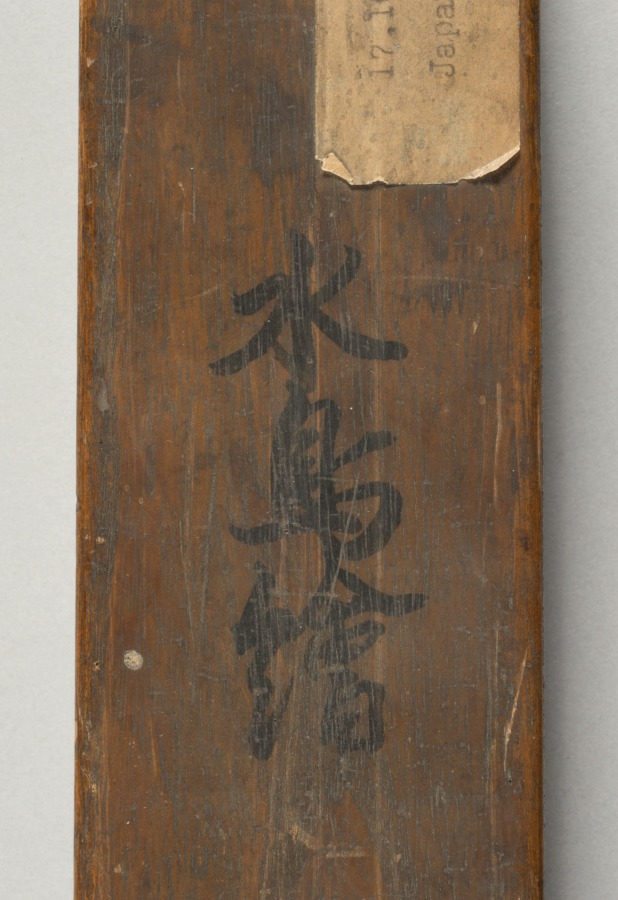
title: Ducks and Reeds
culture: Japan, Momoyama period (1573-1615) to Edo period (1615-1858)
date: early 1600s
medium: hanging scroll; ink on paper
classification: Painting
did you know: This painting was produced by a member of the Kano school.